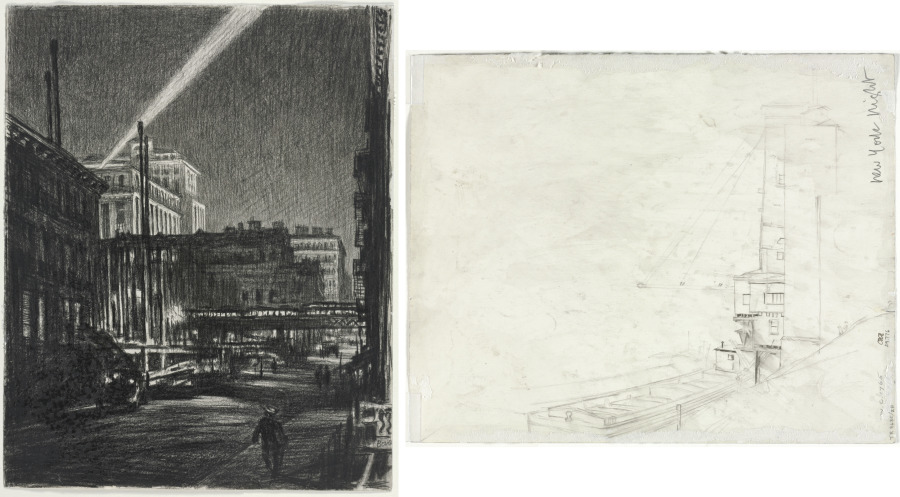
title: New York Night (recto) Study for New York Night (verso)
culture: England, 20th century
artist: Muirhead Bone (British, 1876–1953)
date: c. 1920–40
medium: charcoal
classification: Drawing